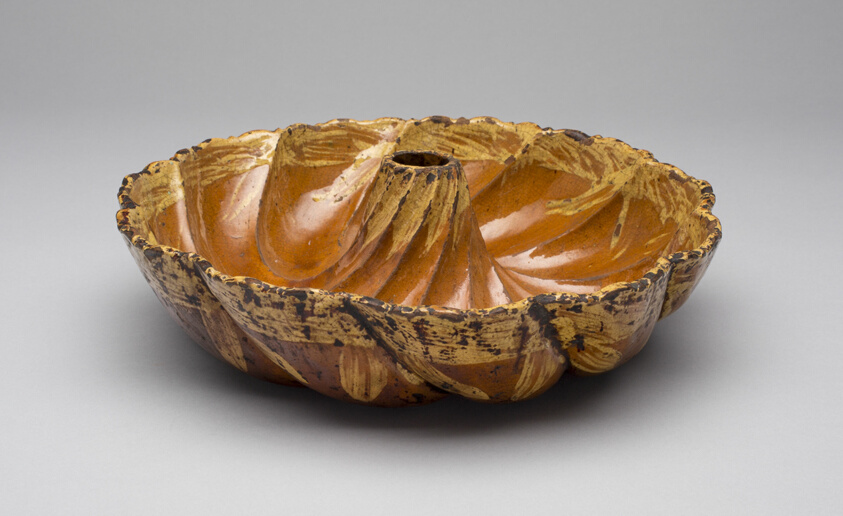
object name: Decorative Arts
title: Cake mold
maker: Artist unknown (American, 19th century); Pennsylvania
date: 1800–50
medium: Earthenware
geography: Pennsylvania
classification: bakeware; earthenware; ceramics; american decorative arts; american arts; decorative arts